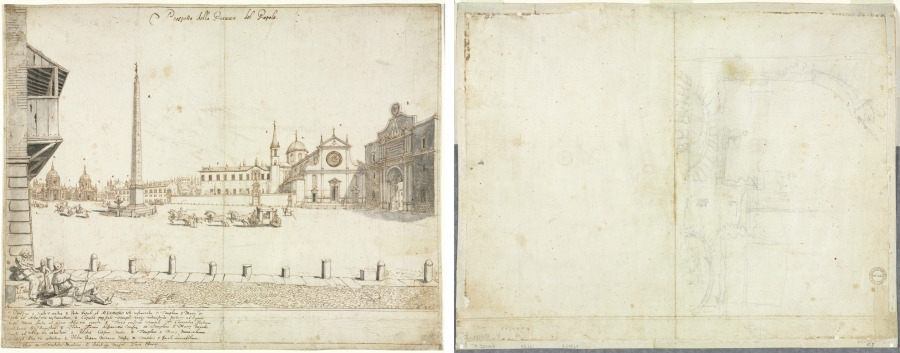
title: Eighteen Views of Rome: The Piazza del Popolo (recto); Sketch for San Giovanni in Laterano (verso)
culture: Flanders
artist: Lievin Cruyl (Flemish, c. 1640-c. 1720)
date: 1664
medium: pen and brown ink and brush and gray wash over stylus and graphite; framing lines in brown ink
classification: Drawing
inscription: recto: signed, lower left, in brown ink: [artist monogram: CL]. INV. et / del: Romæ / 1664. ; by artist, upper center, in brown ink: Prospetto della Piazza del Popolo. ; by artist, throughout composition, in brown ink: [the letters A-O] ; by artist, lower left, in brown ink: A. Obeliscus a Xysto V. erectus. B. Porta Populi ab ALEXANDRO VÎÎ: restaurata. C. Templum S. Maria de / Populo ab Alex. vii. restauratum. D. Cupula praefati Templi varijs intrinsecùs picturis ab Equite / Raph: Vanni factis ab eodem Alex. vii. ornata. E.Turris eiusdem Templi. F. Conventus Fratrum / Eremitarum S. Augustini. G. Platea Forum hispanicum Versus. H. Templum S. Mariæ Montis / Sancti ab Alex: vii. extructum. I. Platea Cursum Versus. K. Templum S. Mariæ Miraculorum / [illegible]dem ab Alex. vii: extructum. L. Platea Ripam Minorem Versus. M. Templum S. Jacobi incurabilium. / [N. Tem]plum SS. Trinitatis Montium. O. Palatium Magni Ducis Etruriæ. ; lower center, in graphite: L[illegible] ; lower right, in graphite: 2 verso: upper right, in brown ink: [2?]S46 [partially masked] ; ON PAPER STRIP MOUNTED TO PERIMETER, lower left, in graphite: A20969 ; lower right, in graphite: E. 7